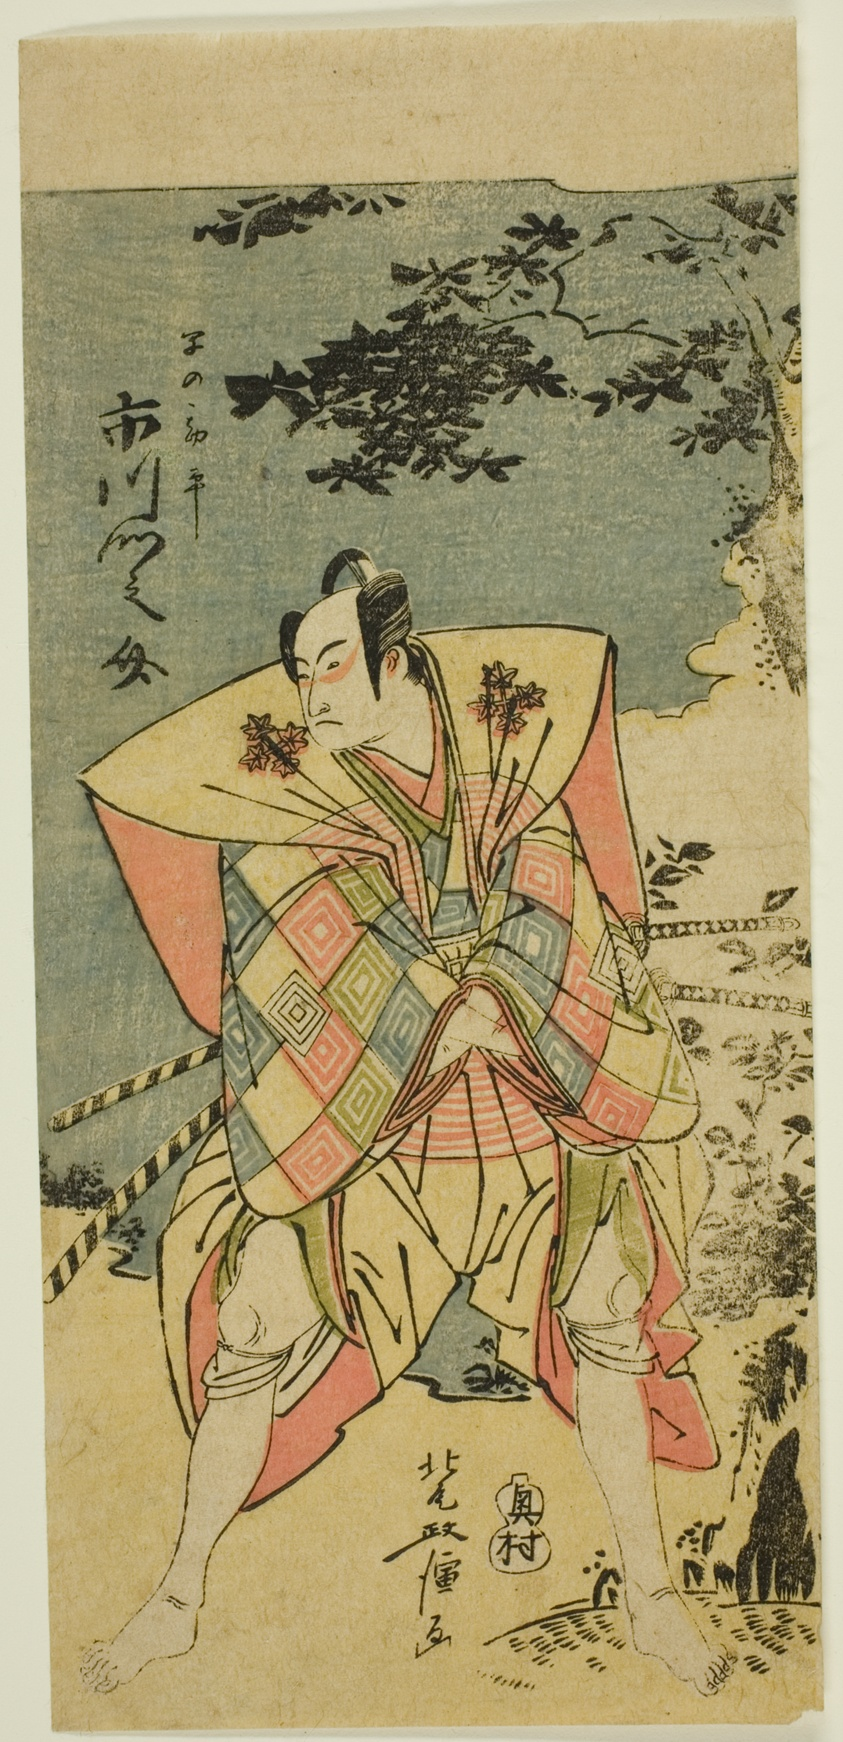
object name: Print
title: Ichikawa Monnosuke II as Haya no Kanpei in "Chushingura Nagori no Kura."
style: Japanese (culture or style)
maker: Kitao Masanobu (Santo Kyoden); Japanese, 1761–1816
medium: Color woodblock print, hosoban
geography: Japan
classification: woodblock print; print; asian art